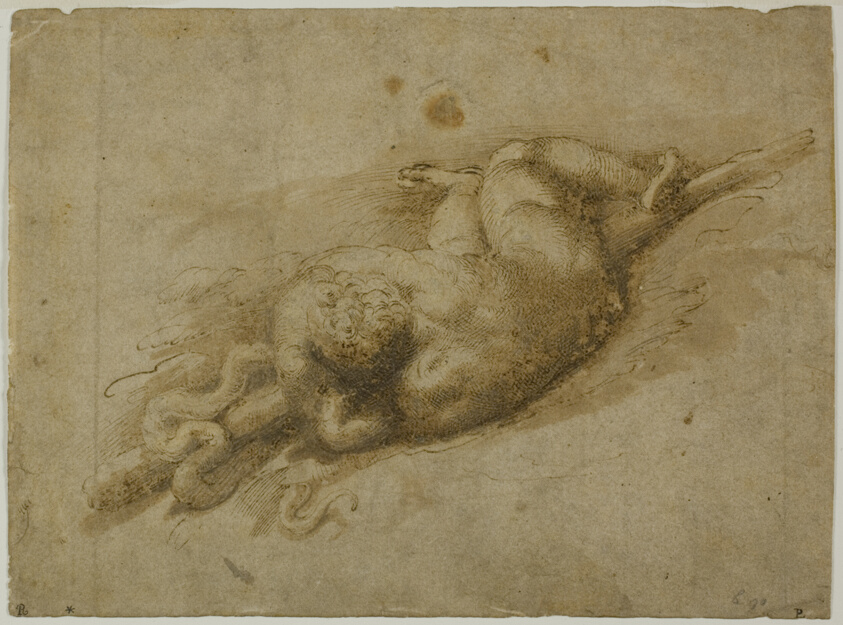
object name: Drawing and Watercolor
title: Infant Hercules (recto); Standing Putto with Hand to Chin (verso)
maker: Follower of Francesco Mazzola, called Parmigianino; Italian, 1503-1540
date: 1523/1540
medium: Pen and brown ink with brush and brown wash (recto), and pen and brown ink with traces of red chalk (verso), on tan laid paper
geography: Italy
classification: ink with wash; drawings (visual works); prints and drawing